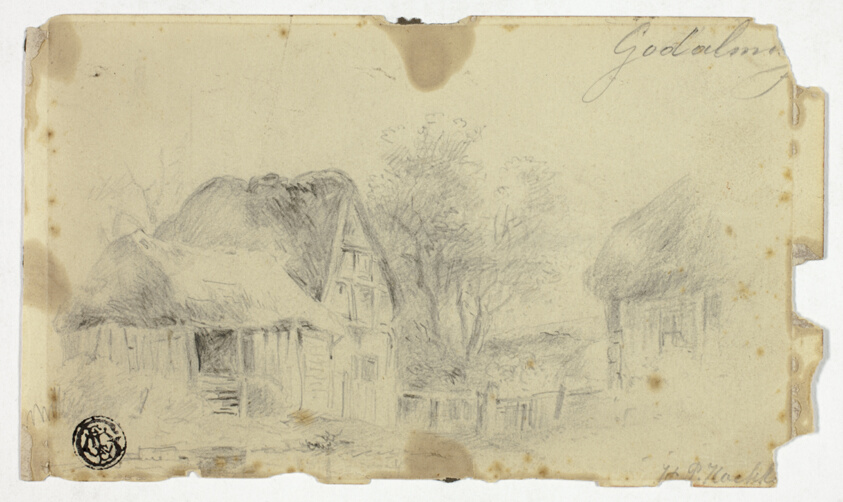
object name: Drawing and Watercolor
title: House with Thatched Roof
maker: Hendrik Pieter Koekkoek (Dutch, 1843-c. 1890)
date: c. 1877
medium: Graphite on cream wove paper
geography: Holland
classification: graphite; drawings (visual works); prints and drawing